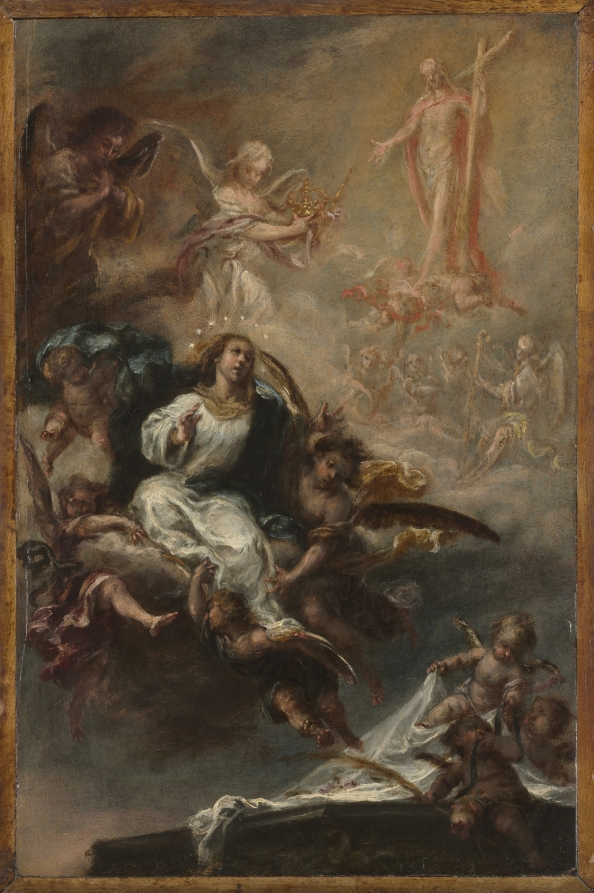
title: Study for "The Assumption of the Virgin" for San Augustín, Seville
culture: Spain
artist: Juan de Valdés Leal (Spanish, 1622–1690)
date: c. 1670–72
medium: oil on wood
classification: Painting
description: This painting is a sketch for a large altarpiece. The rough, flickering surface, the unusually sharp contrast of hot and cool hues, and the compression of space all characterize the artist’s intense spirituality and unique technique. While often held apart from the sweetness and grace of Murillo (also represented in the collection), his contemporary in Seville, the two artists worked closely together on commissions and often presented their work side by side, speaking to the stylistic diversity and religious complexity preferred by patrons in Seville during the late 1600s.